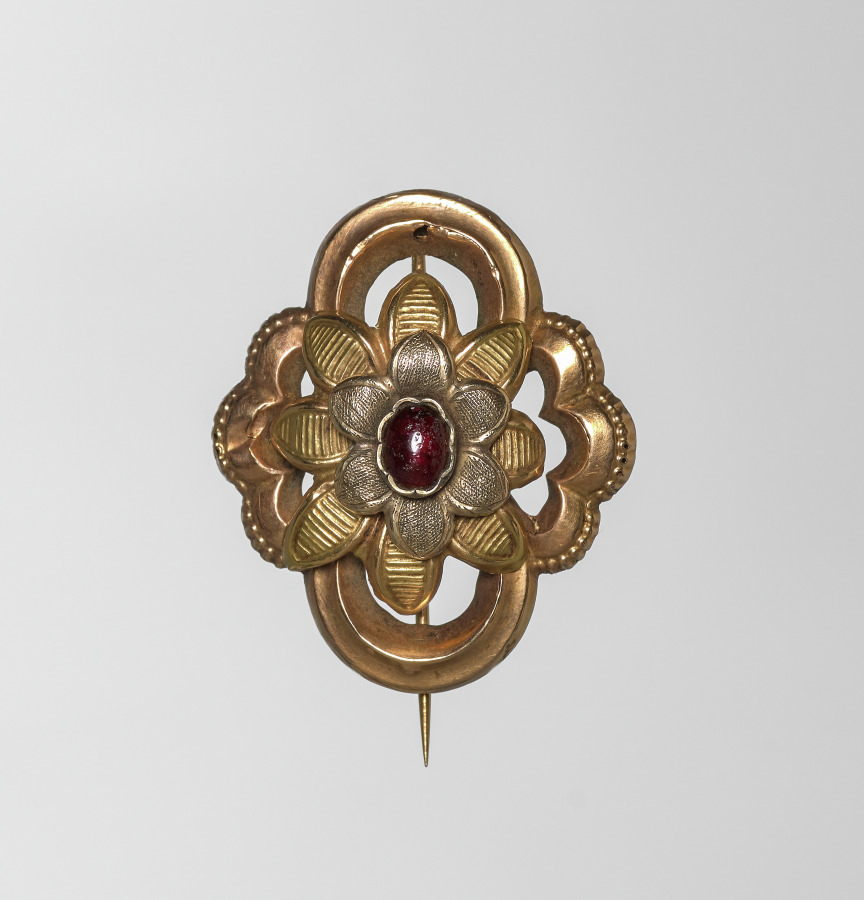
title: Woman's Costume (Brooch)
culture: Italy, 19th century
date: 1800s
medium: gold and jewels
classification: Jewelry